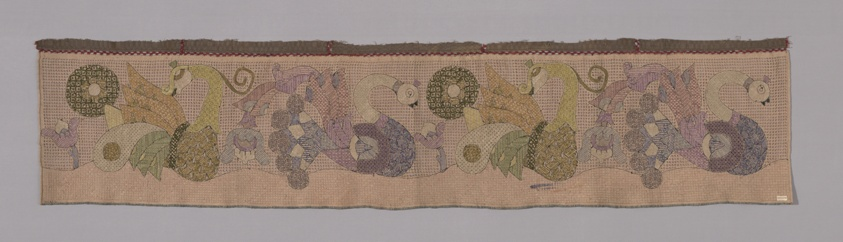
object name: Textile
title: Square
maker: Ukraine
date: 19th century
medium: Linen; drawn work and embroidered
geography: Ukraine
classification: needlework (visual works); weaving; textile